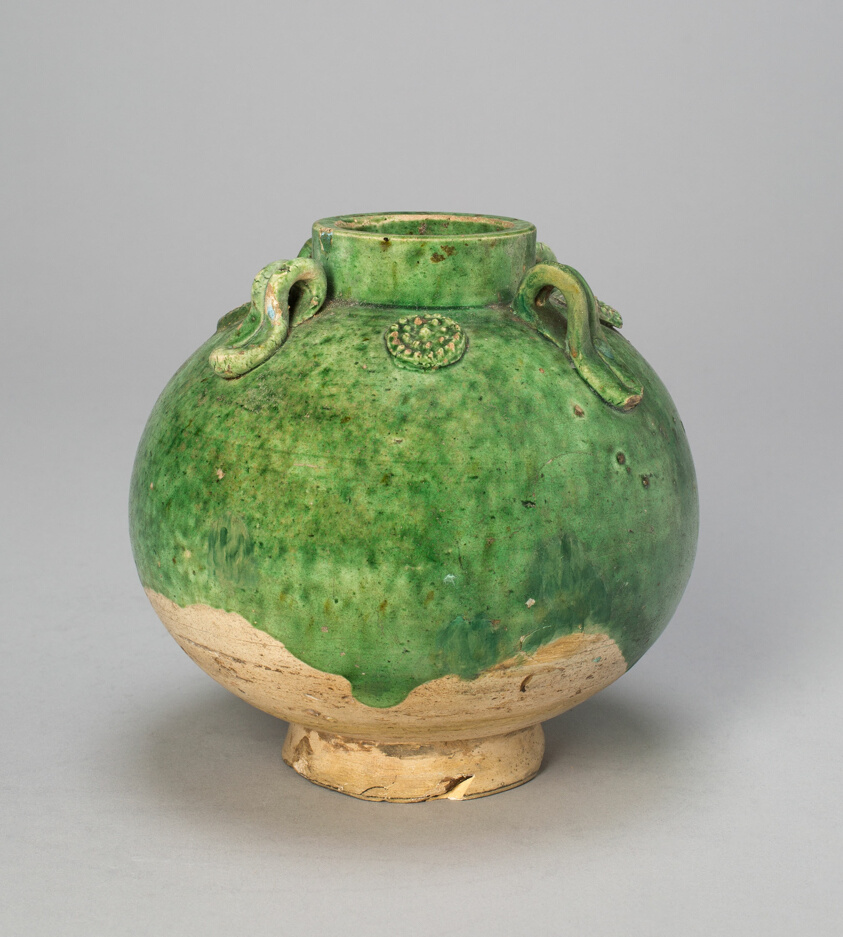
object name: Vessel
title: Globular Jar with Loop Handles and Medallions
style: Chinese (culture or style)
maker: China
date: Tang dynasty (618–906), 8th century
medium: Earthenware with green glaze and underglaze molded decoration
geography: China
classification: earthenware; asian art; ceramics; vessel